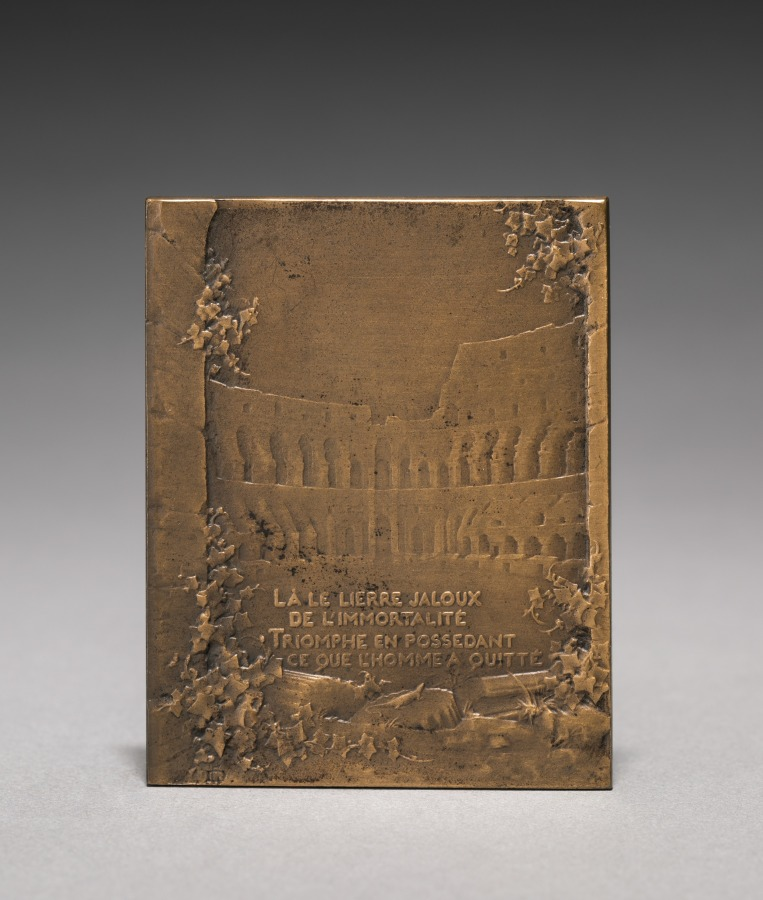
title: Medallion (reverse)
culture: France, 19th-20th century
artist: Jules Dupré (French, 1811–1889)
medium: bronze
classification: Metalwork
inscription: "La le lierre jaloux de l'immortalite triomphe en possedant ce que l'homme a quitte" (There the ivy, jealous of immortality triumphs in possessing that which man has left).